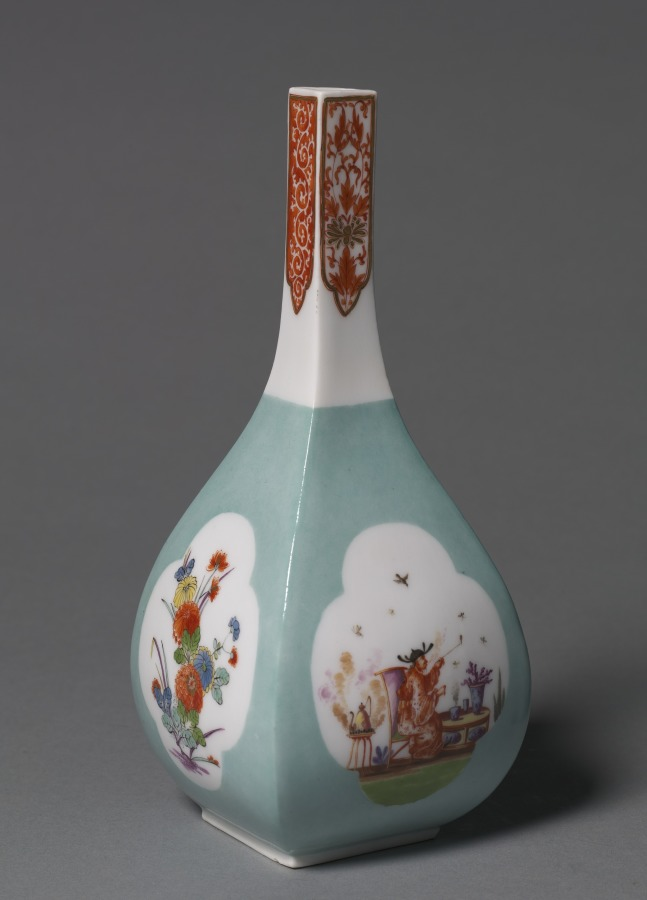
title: Saki Bottles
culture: Germany, Meissen, 18th century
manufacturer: Meissen Porcelain Factory (German, est. c. 1710)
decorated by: probably by Johann Gregor Herold (German, 1696–1775)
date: c. 1730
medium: porcelain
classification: Ceramic